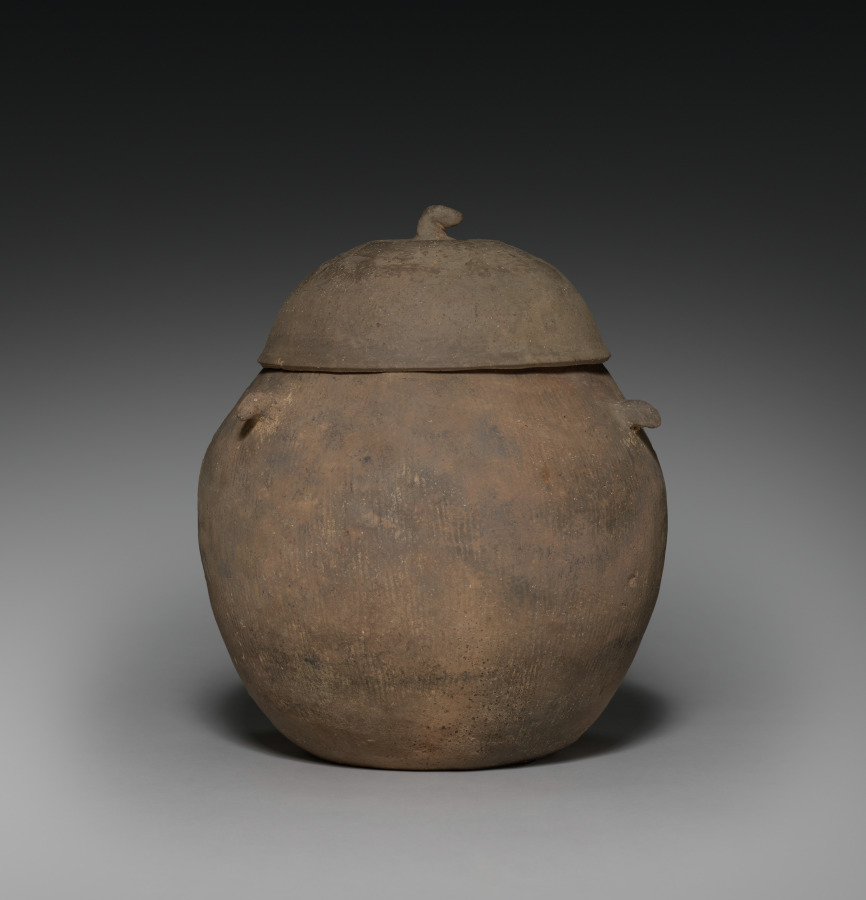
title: Lidded Jar with Four Horn Lugs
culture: Korea, Gaya period (42–562 CE)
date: 200s–400s CE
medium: earthenware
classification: Ceramic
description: Early earthenware from the Three Kingdoms period (57 BCE–668) became widely utilized as agriculture and religion grew to be essential elements in sustaining society and its systems. The clay jars of different sizes and shapes on display were made for the following purposes: some were used to store harvested grains and seeds, some to preserve cremated remains, and some to serve offerings in rituals.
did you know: This pottery vessel served to contain cremated remains, indicating the popularity of Buddhist mortuary practice in Korea during the Three Kingdoms period.